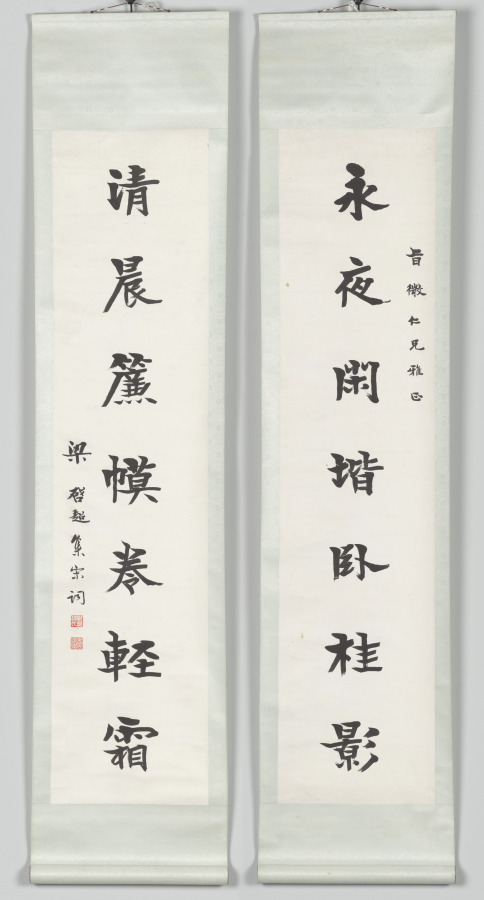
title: Calligraphy Couplet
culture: China, Republican period (1912-49)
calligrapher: Liang Qichao (Chinese, 1873–1929)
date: after 1911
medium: Pair of hanging scrolls; ink on paper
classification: Calligraphy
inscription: 永夜鬧皆臥桂影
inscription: 旨徽仁兄雅心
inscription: 清晨簾幕卷輕霜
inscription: 梁啟超筆宋詞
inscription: [印] 新會梁氏. [印] 啓超和印.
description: The prominent politician and modern reformer Liang Qichao writes here in an angular, firm, and little modulated regular script style, inspired by inscriptions incised on ancient stone steles. Those script styles were popular among reformers of the time, as they sought to revive the ancient culture and built a new China on the country’s strong ancient foundations. Each scroll cites the verse of a historic cultural figure in Chinese history.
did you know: Liang Qichao aimed to reform the country and strengthen its foundations through the revival of the ancient culture of China.